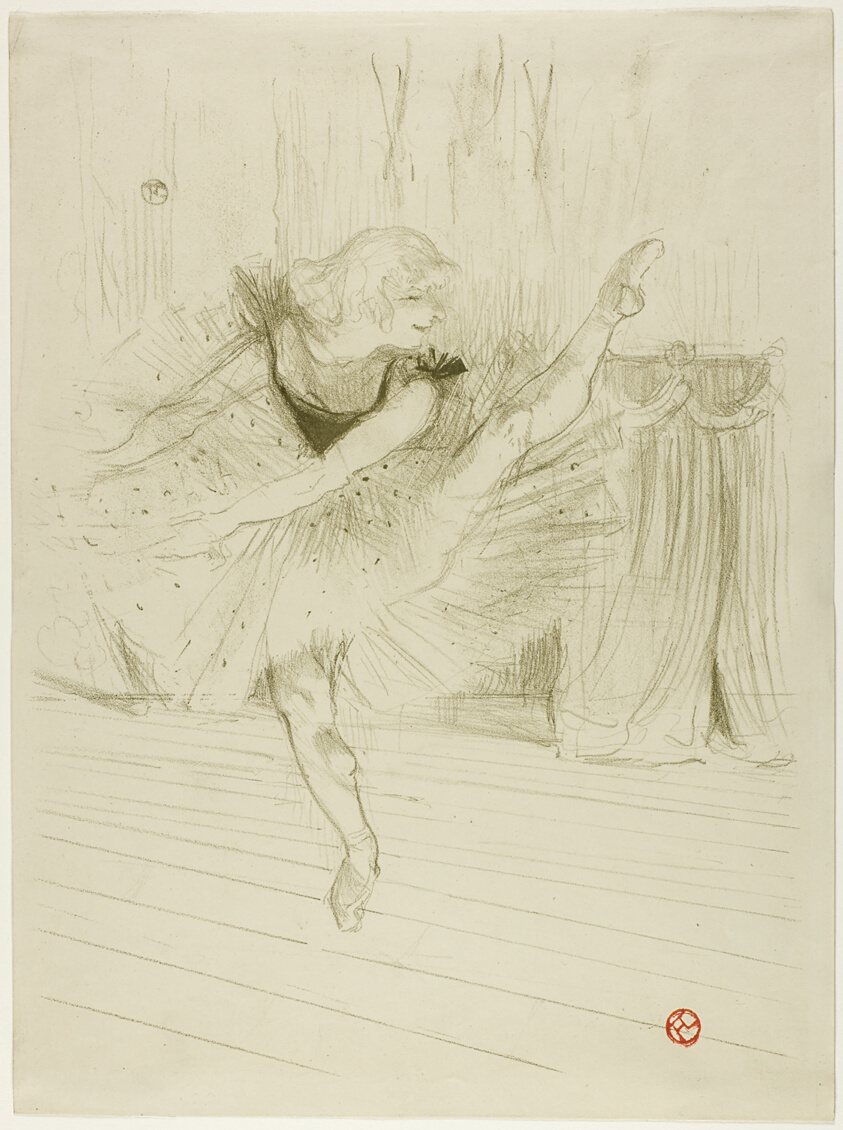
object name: Print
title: Miss Ida Heath, English Dancer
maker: Henri de Toulouse-Lautrec (French, 1864-1901)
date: 1894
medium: Color lithograph on cream wove paper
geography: France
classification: lithograph; print; prints and drawing